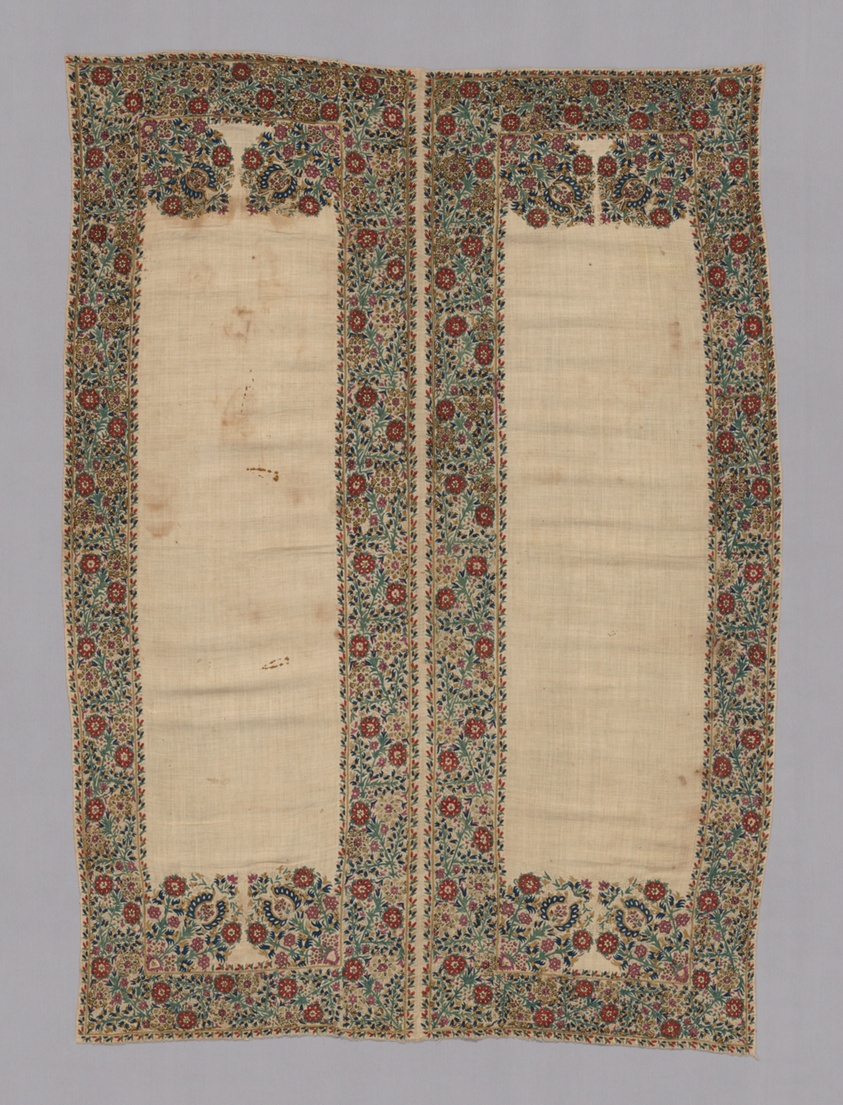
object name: Textile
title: Bolster Cover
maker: Greece, Epirus Province, Ioannina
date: 18th century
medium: Linen, plain weave; embroidered with silk yarns in closed herringbone and stem stitches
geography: Greece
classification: textile; needlework (visual works)